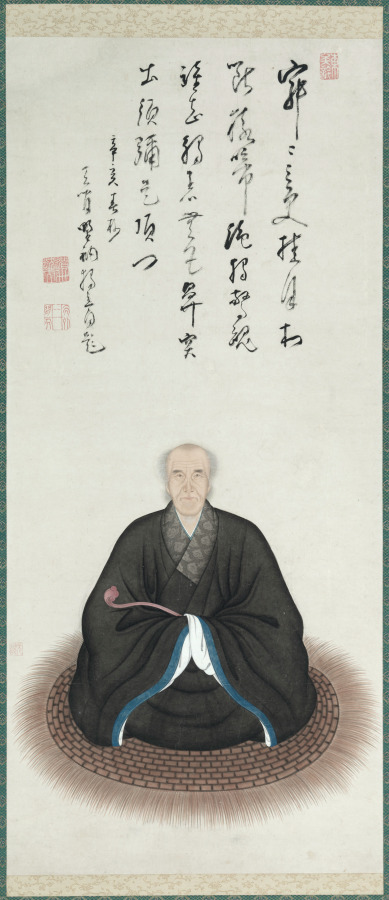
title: Portrait of Duli Xingyi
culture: Japan, Edo period (1615–1868)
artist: Kita Genki (Japanese, active c. 1664–98)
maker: Duli Xingyi (Chinese, 1596–1672)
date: 1671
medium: hanging scroll; ink and color on paper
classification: Painting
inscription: 1671 inscription at top of scroll by Duli Xingyi with three seals, 東矣䪩 (prefatory), 遺世獨立 (top) , 天外一閒人 (bottom); seal of Genki at lower left of painting 元規 .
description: In this portrait, the Ōbaku school Buddhist monk Duli Xingyi (born Tai Li, 1596–1672), whose name is pronounced Dokuryū Shōeki in Japanese, sits upon a woven mat holding a ceremonial scepter known as a ruyi, or nyoi in Japanese. Above his head is an insciption he added to the painting in 1671, the year before his death. It may be translated to read: Contemplative emptiness: the moon suspended over the village at midnight. Suddenly my soul is startled by the howl of an ape. Who could know that it would arouse me beyond my senses, and bring me an inner vision from Mt. Sumeru. (translated by Stephen Addiss and Kwan S. Wong) Originally from what is now the city of Hangzhou in China, Duli emigrated to Japan in 1653, where he took monastic vows. His skills in calligraphy and seal carving were formidable. Painter Kita Genki combined Chinese brush styles he learned in Nagasaki with Western painting techniques to capture Duli's likeness.